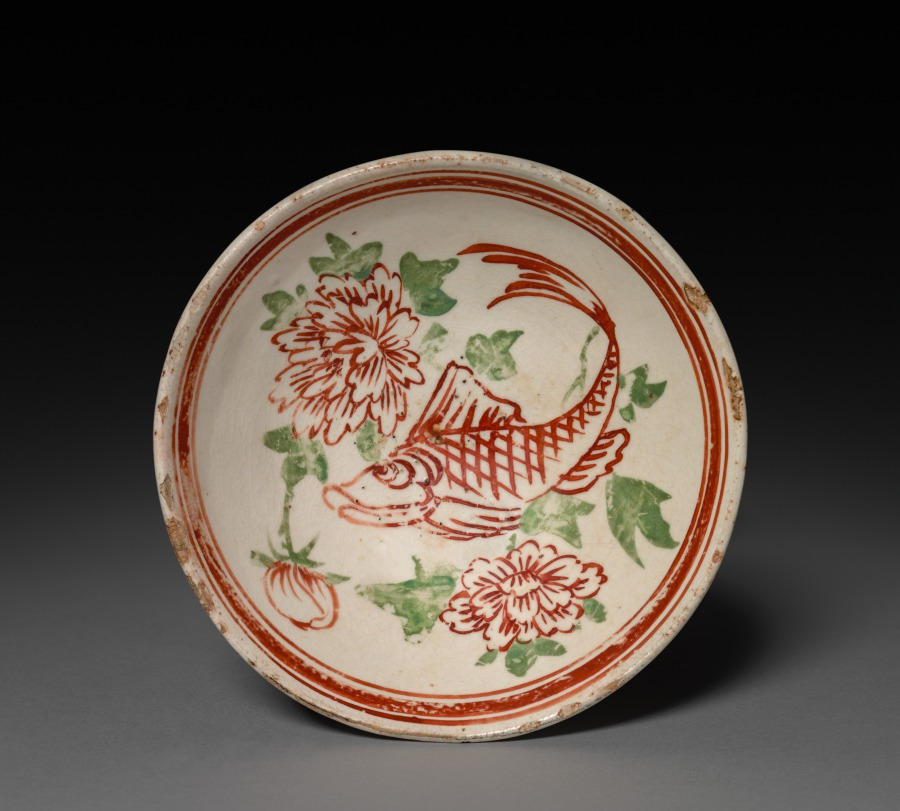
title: Cup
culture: China, Jin dynasty (1115-1234)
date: 1100s–1200s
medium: buff stoneware with underglaze slip application and overglaze enamel decoration, Cizhou ware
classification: Ceramic